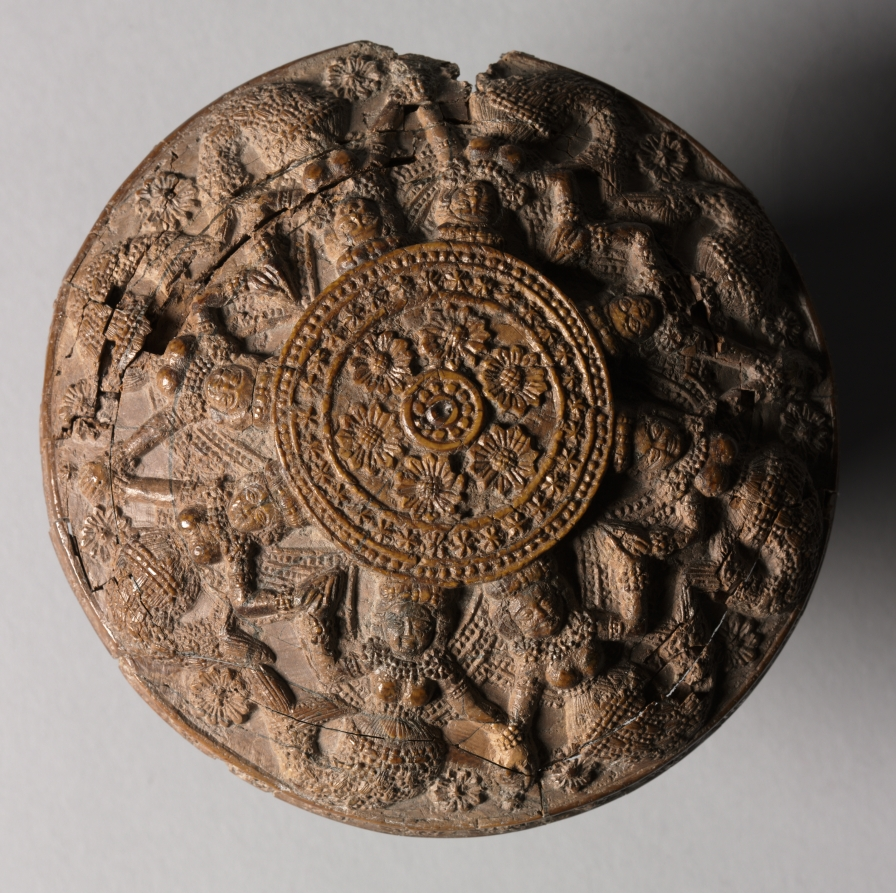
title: Roundel with Mermaids and Lotus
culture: India, Bengal, Chandraketugarh area, Shunga period (185–78 BCE)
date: c. 100 BCE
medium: ivory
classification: Ivory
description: This ivory disk was possibly part of a massive earring around which lobes were stretched so that they rest on the shoulders. Eight figures that are half woman and half fish hold hands in a ring around a series of concentric circles containing floral imagery. Their hands and tails make the repeated form of an auspicious trident-shaped symbol, often depicted with fish tails in combination with a lotus flower. The full-breasted forms, the tails, and the lotus flowers evoke the imagery of life-giving waters. A circle of eight female figures later comes to refer to the maidens of the eight directions of the sky (ashtadikpalikas).